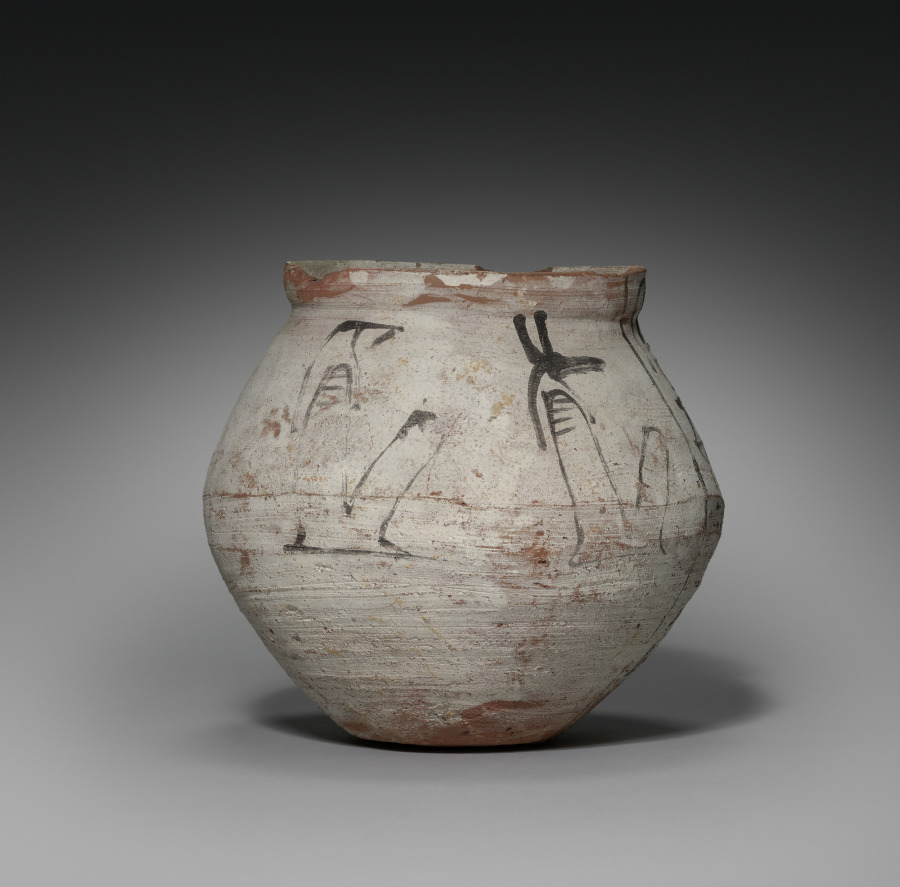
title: Shawabty Jar with Lid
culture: Egypt, New Kingdom (1540–1069 BCE), Dynasties 19–20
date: 1295–1069 BCE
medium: Nile silt ware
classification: Funerary Equipment